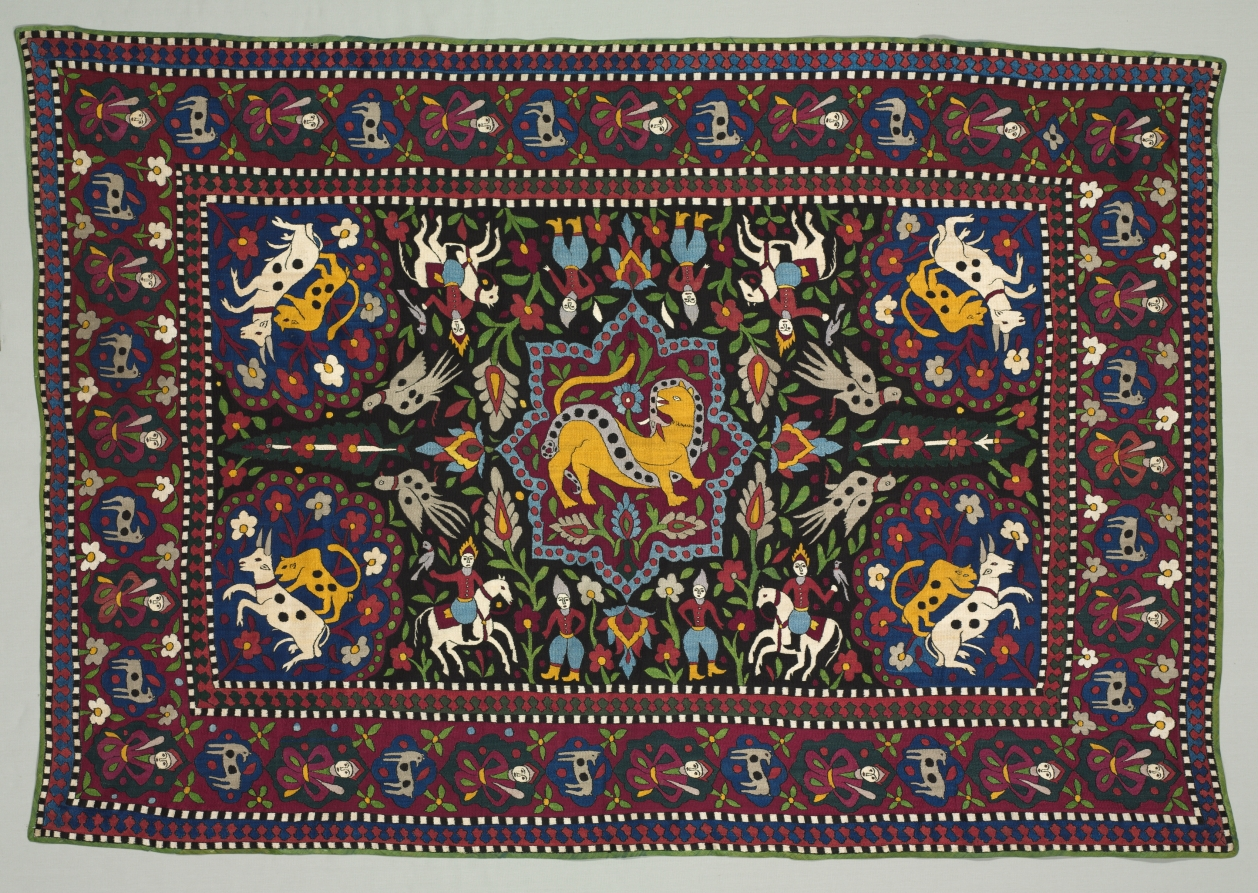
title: Ceremonial or summer floor cover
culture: Iran, Qajar period (1779-1925)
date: 1800s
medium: cotton: plain weave; silk: embroidery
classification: Embroidery